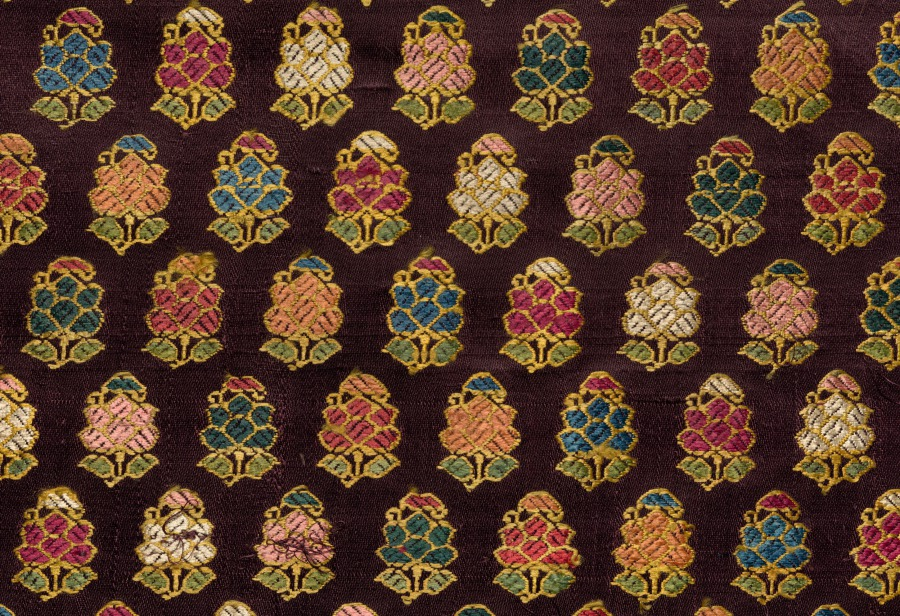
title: Fragment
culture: India, 19th century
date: 1800s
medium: brocade, "himru"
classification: Textile